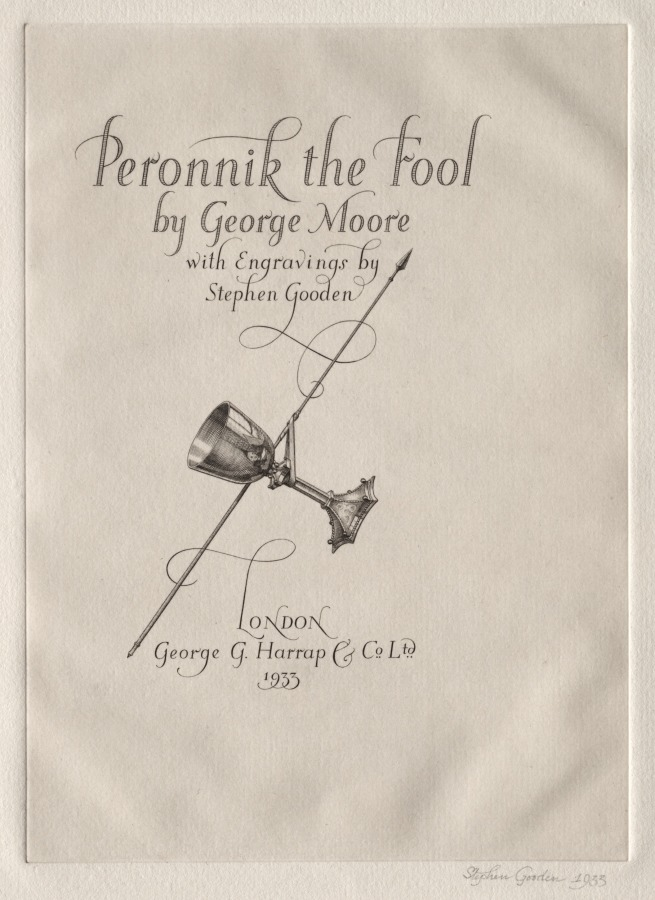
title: Illustrations for "Peronnik the Fool"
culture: England, 20th century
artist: Stephen Gooden (British, 1892–1955)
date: 1933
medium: engraving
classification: Print